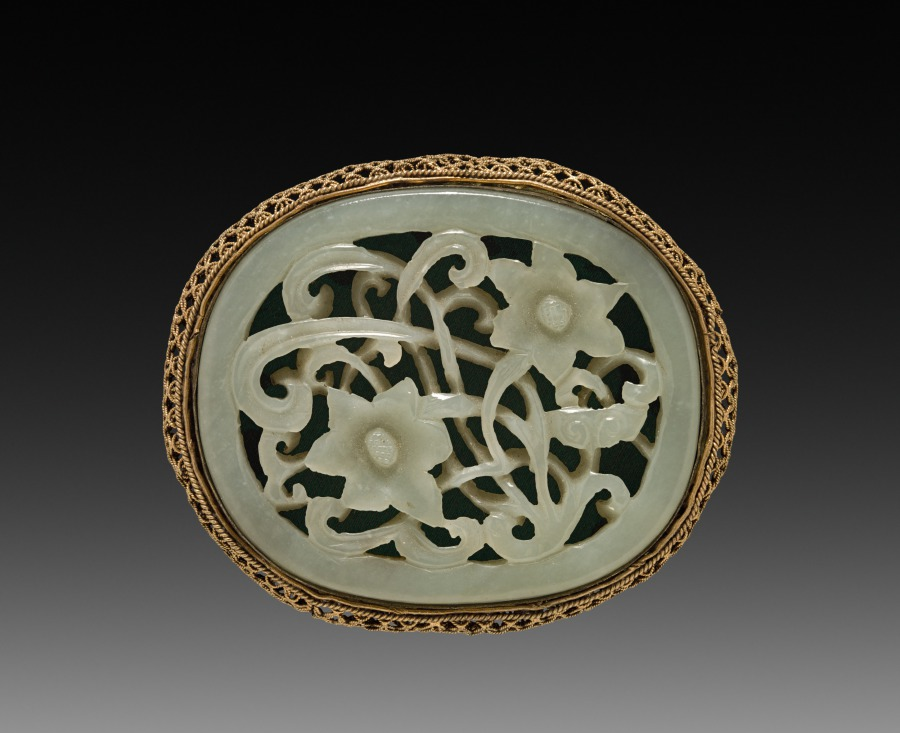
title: Buckle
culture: China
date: 1900s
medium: silver gilt and jade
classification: Jewelry